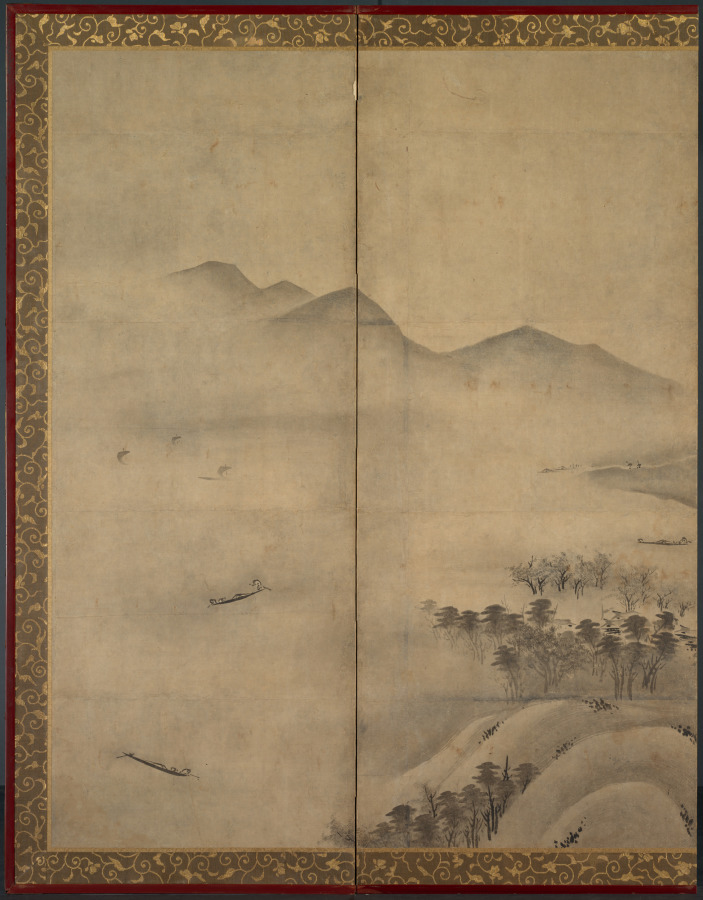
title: Moonlit Landscape (one of a pair)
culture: Japan, Muromachi period (1392–1573)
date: late 1500s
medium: six-panel folding screen, ink on paper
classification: Painting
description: This unsigned and unsealed composition includes imagery from the Eight Views of the Xiao and Xiang Rivers. Scanning the composition from right to left, four of the Eight Views subjects appear: sunset glow over a fishing village, returning sails off a distant shore, autumn moon over Lake Donting, and evening bell from a mist-shrouded temple. Not all the elements of the traditional Eight Views theme are here, but the artist suggests its literary presence by leading the viewer through a summer’s journey from one day to the next, aided, like the travelers in the landscape, by the light of the moon.